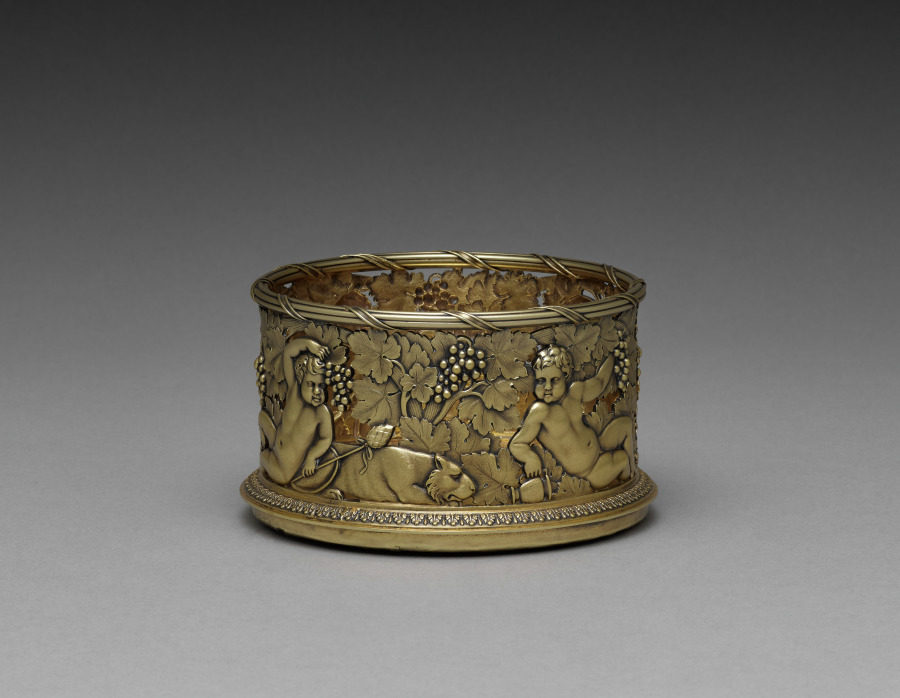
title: Decanter Stand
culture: England, London, 19th century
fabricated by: Paul Storr (British, 1771–1844)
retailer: Rundell, Bridge and Rundell (British, 1797–1834)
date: 1814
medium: silver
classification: Silver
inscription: Engraved on rim of base: "RUNDELL BRIDGE ET RUNDELL AURIFICES REGIS ET PRINCIPIS WALLIAE REGENTIS BRITANNIAS." Engraved on base of interior: Unidentifiable crest with bird over other animal.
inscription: Scratched on rim of base: "6625"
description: Decanter stands served as coasters for glass wine bottles in order to protect the extremely expensive and fragile linen tablecloths they sat upon. This example contains depictions of large grape vines and youthful figures that evoke the Roman god of wine, Bacchus (or Dionysus in Greek mythology). One of the young boys grasps an empty drinking vessel while the other leans against a panther, the frequent companion of Bacchus.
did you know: Bacchanal motifs of grapes and consumption echo this object’s function as a stand for a wine decanter.